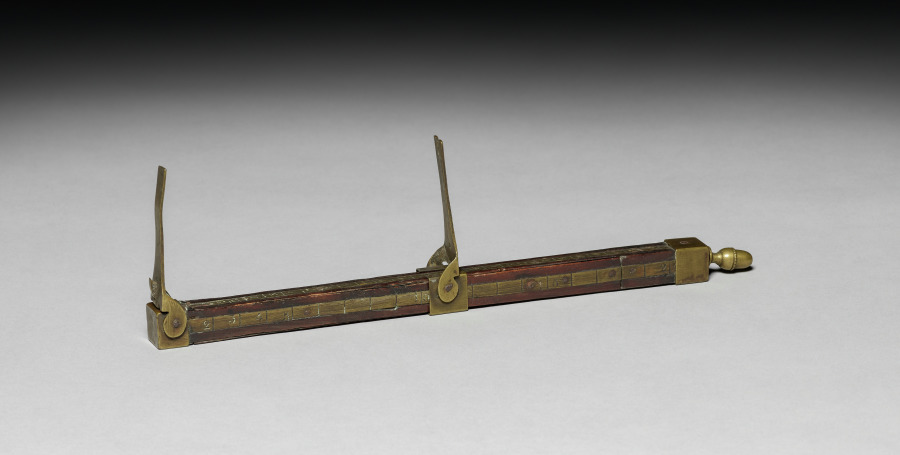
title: Slide Scale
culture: Europe, 18th century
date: 1700s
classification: Tool